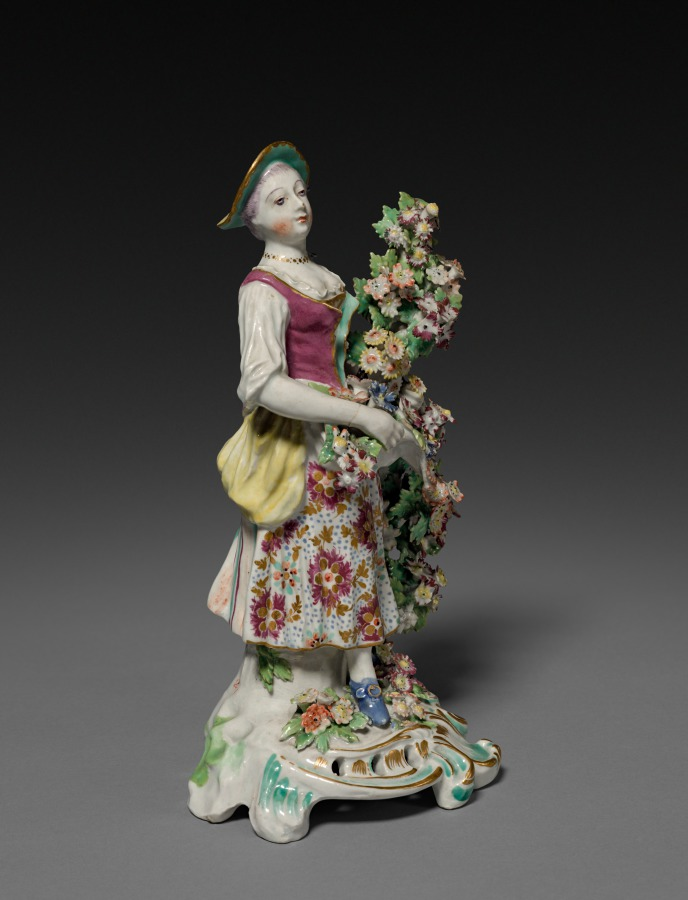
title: Figure of a Gardener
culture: England, London, Bow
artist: Bow Porcelain Factory (British)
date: c. 1765–70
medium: soft-paste porcelain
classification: Ceramic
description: Even though this figure and her counterpart (1945.37) are not accompanied by a sheep, these ceramic sculptures were sometimes known as “Garland Shepherds” during the mid-1700s. The name derived from a similar set produced by one of the Bow Porcelain Factory’s rivals, the Derby Porcelain Factory, in which the male figure holds a lamb. While these two factories often produced similar sets of pastoral, allegorical, biographical, and religious figures, the Bow Factory was known as one of the preeminent porcelain manufacturers, rivaled only by the Chelsea Porcelain Factory, with which Bow would later merge.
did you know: Due to the abundance of flowers surrounding this figure, this Gardener has also been considered a personification of Spring.